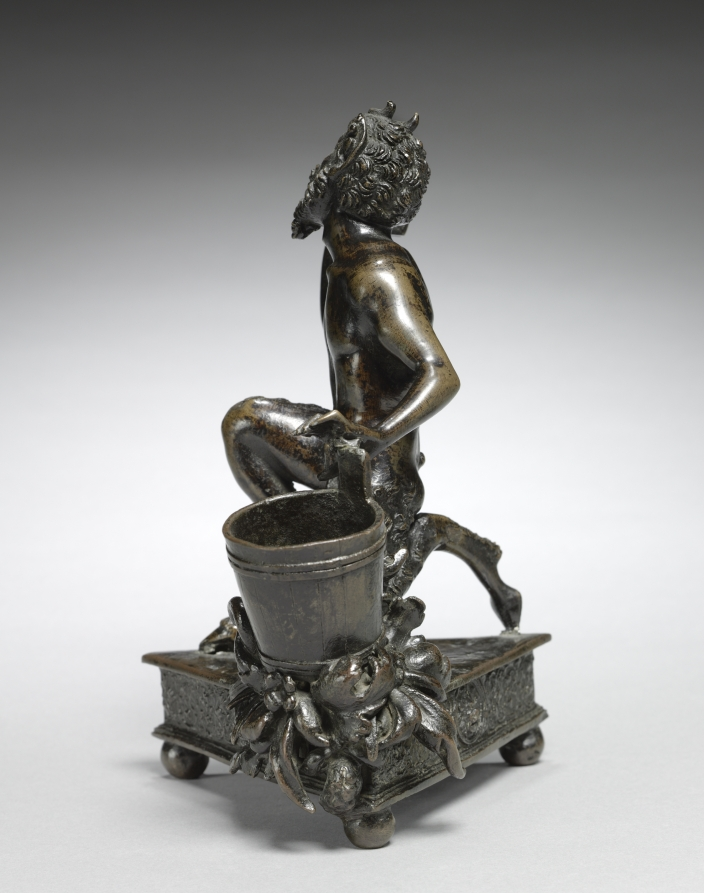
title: Kneeling Satyr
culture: Italy, Ravenna, 16th century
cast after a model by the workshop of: Severo da Ravenna (Italian, c.1496–c.1543)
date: c. 1520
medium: bronze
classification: Sculpture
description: Greek and Roman art and literature typically used satyrs as a form of grotesque comic relief, but Renaissance artists adopted them as jovial celebratory figures of nature and revelry.